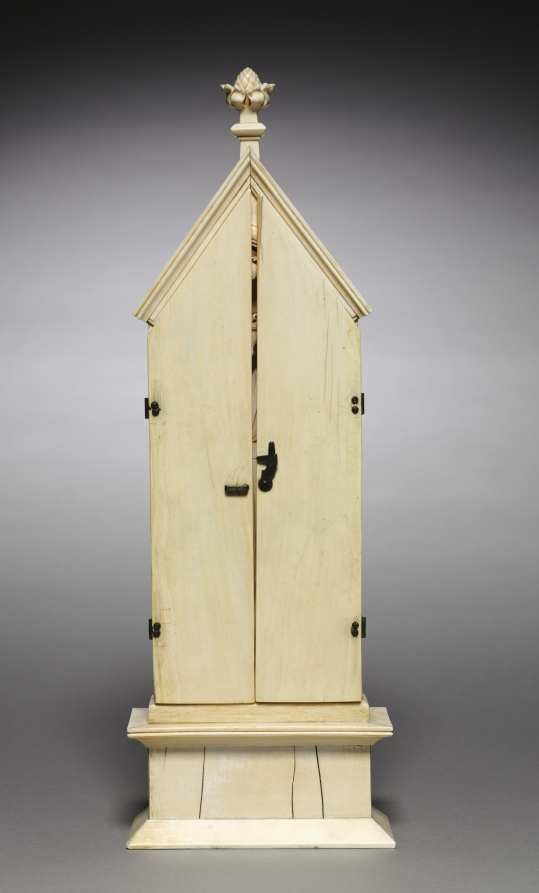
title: Triptych: The Life of the Virgin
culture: France, Lorraine?, or Austria?, Gothic period, 14th century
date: c. 1325–1350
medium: ivory, traces of gilding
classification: Ivory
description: The Virgin and Child, standing beneath a three-part arch, occupy the central plaque of this triptych. On the wings are carved four scenes from the life of the Virgin: the Annunciation, the Visitation, the Adoration of the Magi, and Christ's Presentation in the Temple. By the end of the 12th century, devotional objects like this became widespread in many parts of Western Europe as a result of the growing cult of the Virgin.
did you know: The pinnacle, roof moldings, and base are modern additions attached before the object entered our collection.